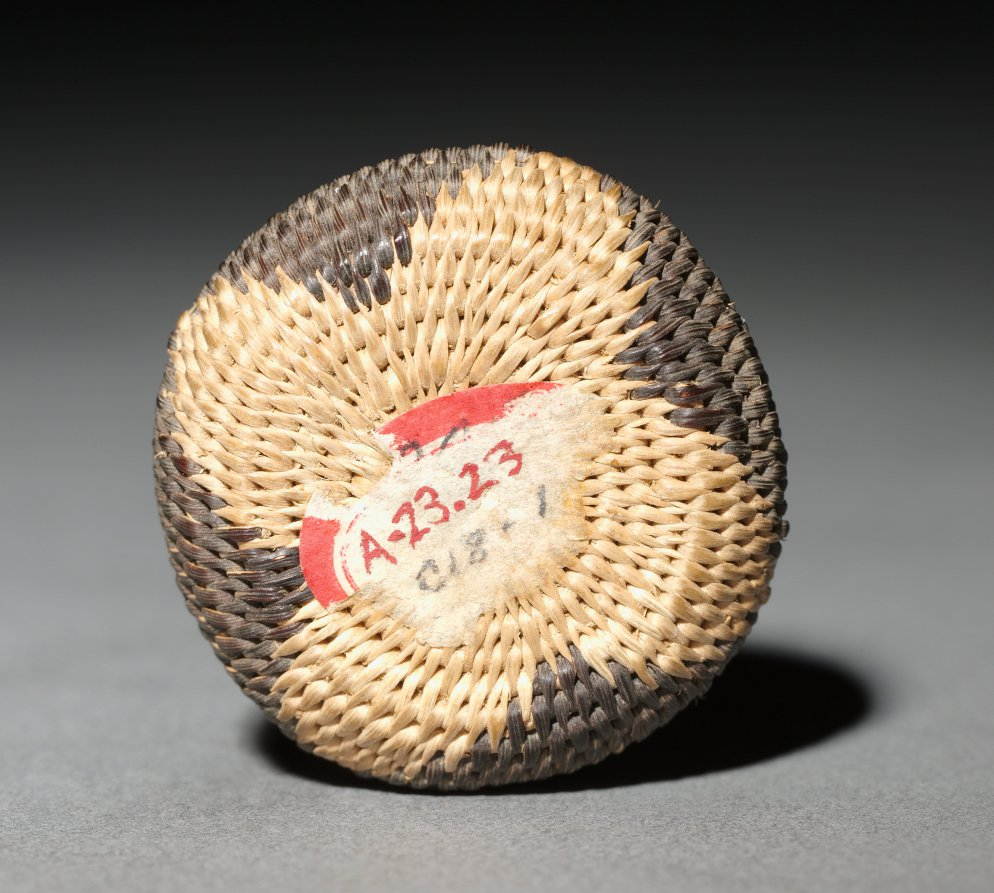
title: Miniature Basket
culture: America, Native North American, Southwest, Arizona, Akimel O'odham (Pima), Unassigned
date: before 1923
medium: plant fiber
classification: Basketry